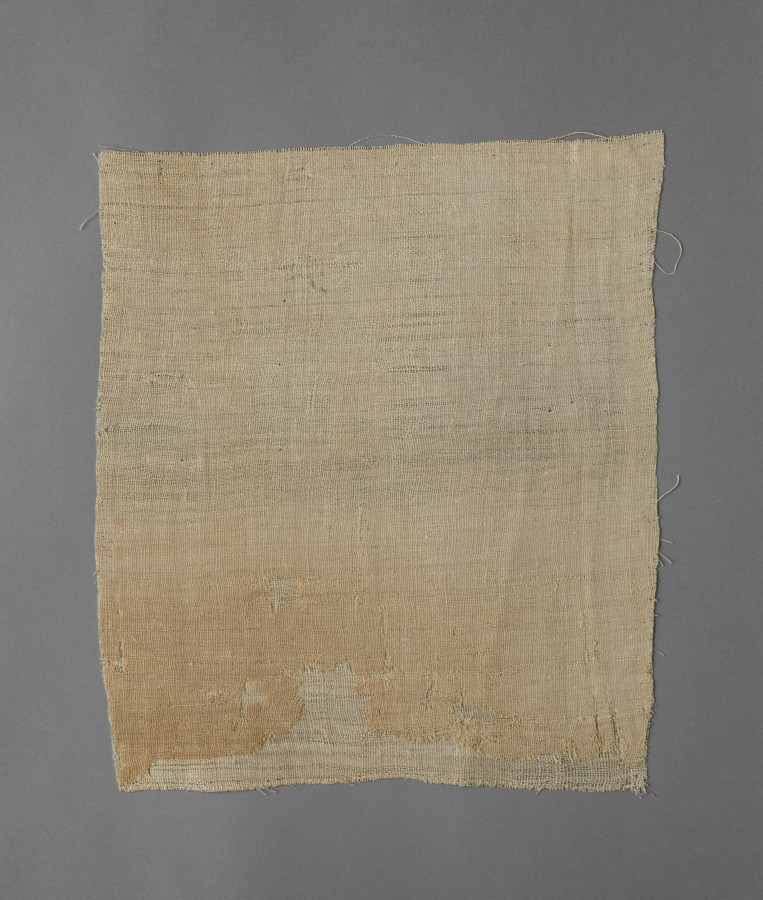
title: Mummy Linen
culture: Egypt, New Kingdom (1540–1069 BCE), Dynasty 18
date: 1550–1291 BCE?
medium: plain weave: linen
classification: Textile